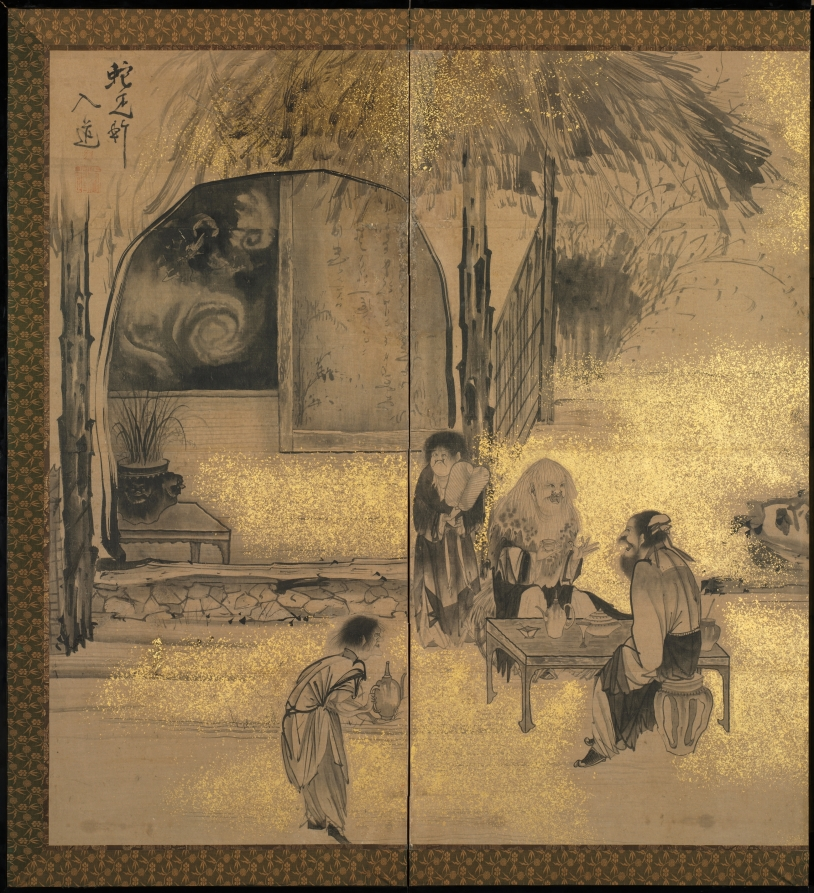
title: The Eight Immortals of the Wine Cup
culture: Japan, Edo period (1615–1868)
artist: Soga Shōhaku (Japanese, 1730–1781)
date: later 1700s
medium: six-panel folding screen, ink and cut-gold foil on paper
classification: Painting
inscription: signature upper left corner.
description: Responding to the desires of the middle class (chonin), some Japanese painters of the late Edo period moved away from the seriousness associated with the Chinese theme of reclusion, focusing instead on the motif’s humorous aspects. The theme Eight Immortals of the Wine Cup is based on a poem by the renowned 8th-century Chinese poet Du Fu about his eight colleagues. These scholars eagerly sought release from their official governmental duties and then supposedly fled the capital for the countryside. There, they engaged in wildly eccentric behavior and adventurous creative work, all fueled by copious amounts of wine. Shohaku’s version of events exaggerates the scholars’ pleasure, as seen in their comical facial expressions.